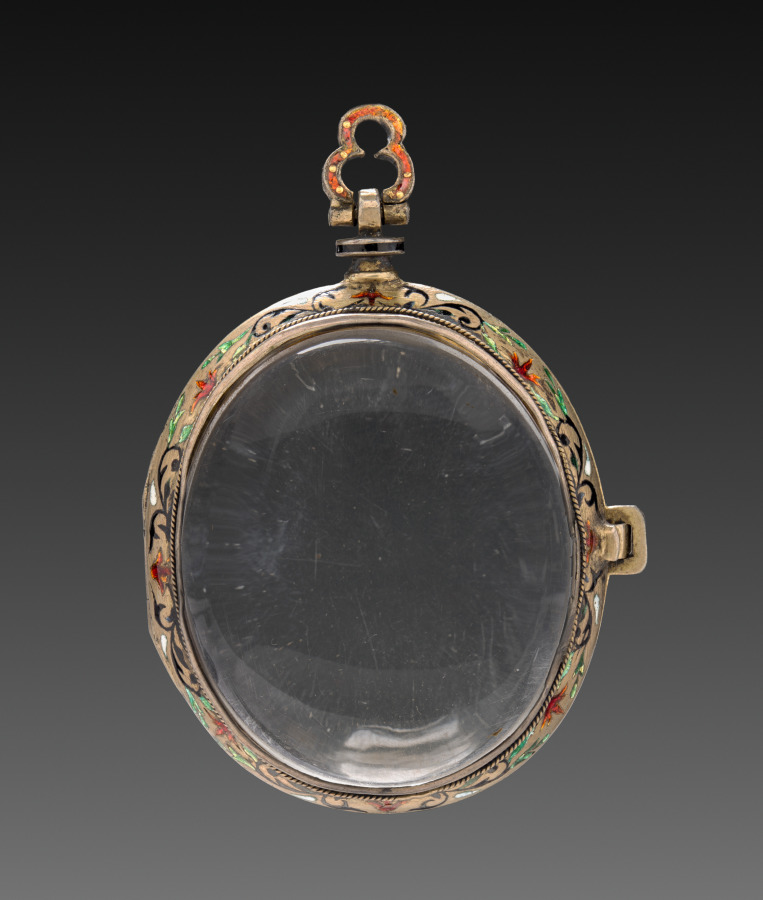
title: Watch Case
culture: Italy, 17th century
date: 1600s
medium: crystal, gilt metal, enamel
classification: Jewelry